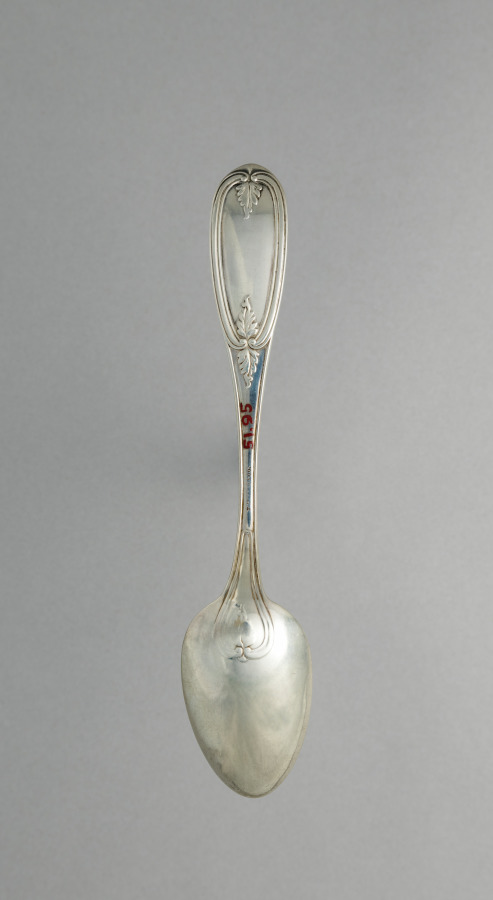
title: Tablespoon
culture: America, Connecticut, Hartford, 19th century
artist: firm of T. Sedgwick Steele (American)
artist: firm of Thomas Steele (American, 1812–1875)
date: c. 1859–1865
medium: silver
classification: Silver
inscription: engraved "JAT" in bright-cut script on top of handle end.